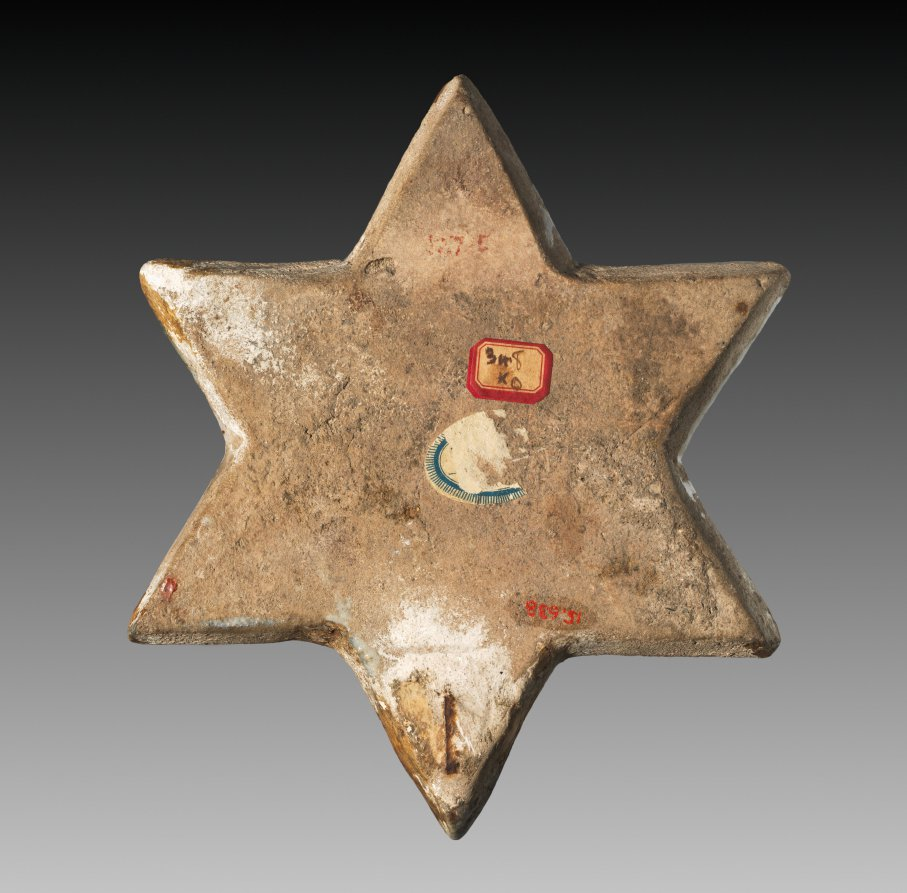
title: Wall Tile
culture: Iran, Kashan, Ilkhanid period (1256-1353)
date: 1300s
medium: fritware with luster-painted design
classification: Ceramic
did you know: This blue and brown luster tile in a 6-point star shape has a border with an inscription.